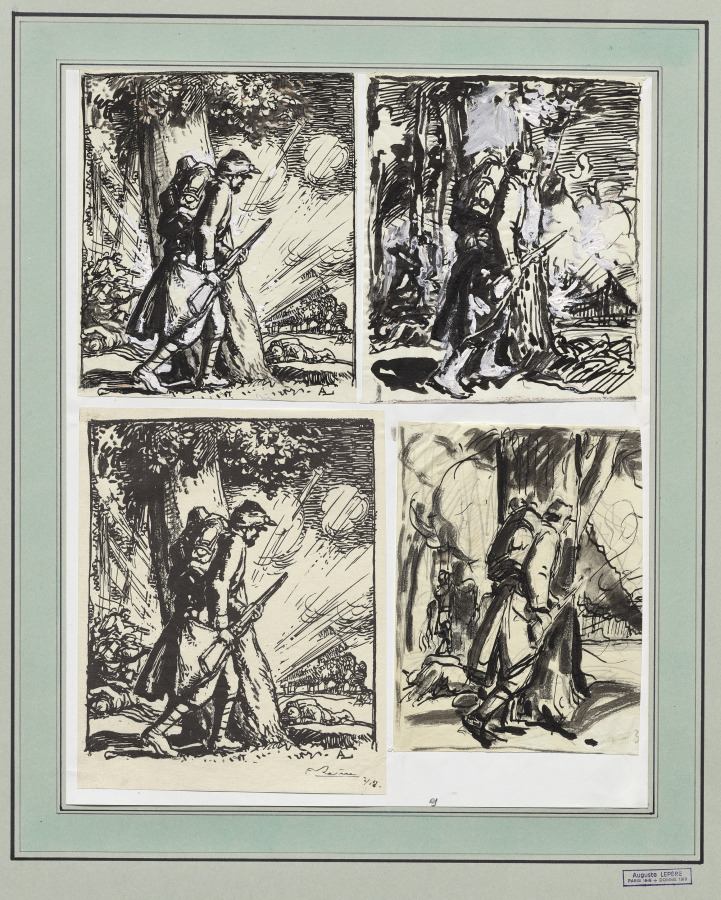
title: Fantassin à l'abri d'un arbre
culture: France, 20th century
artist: Auguste Louis Lepère (French, 1849–1918)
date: 1914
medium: pen and brush and black ink with white highlights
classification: Drawing